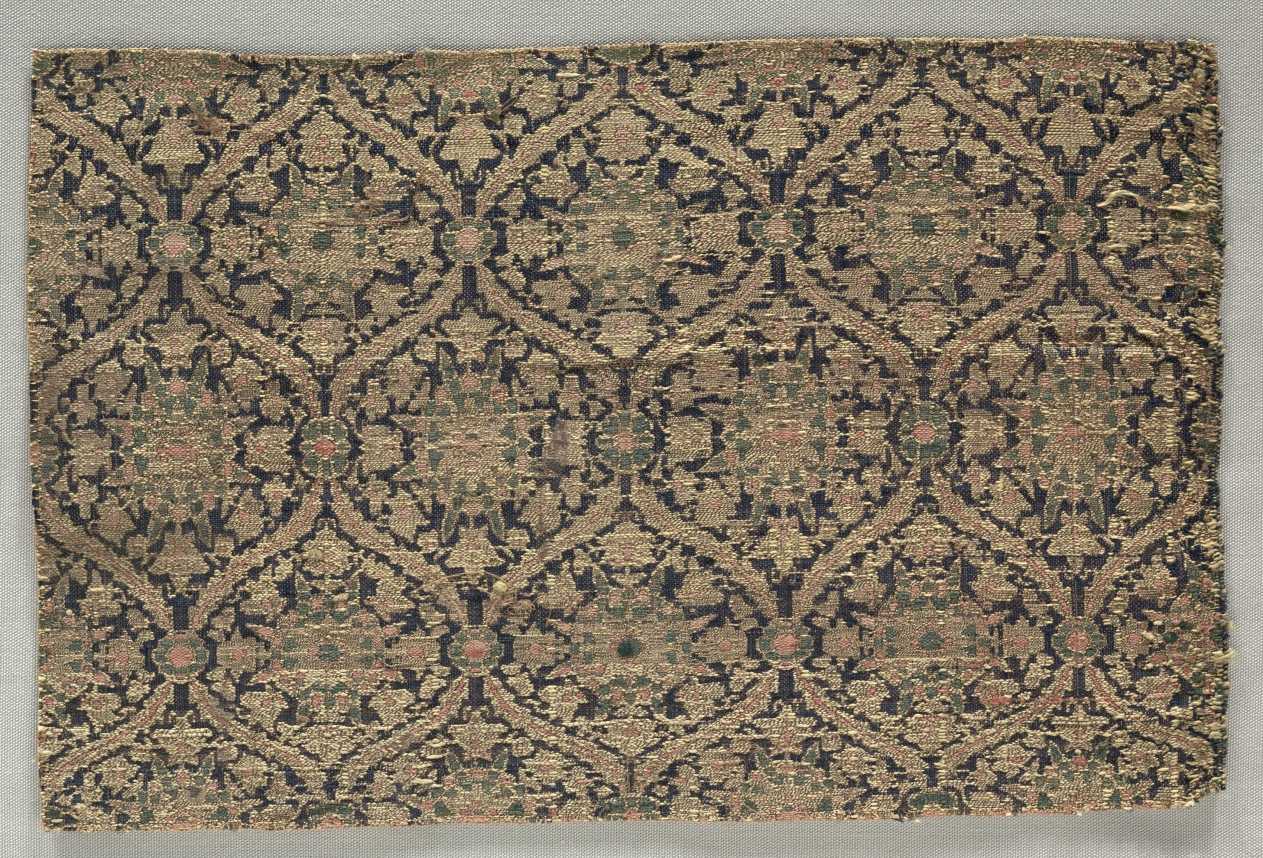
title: Fragment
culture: Iran, 19th c.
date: 1600s - 1700s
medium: Silk taquete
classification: Textile